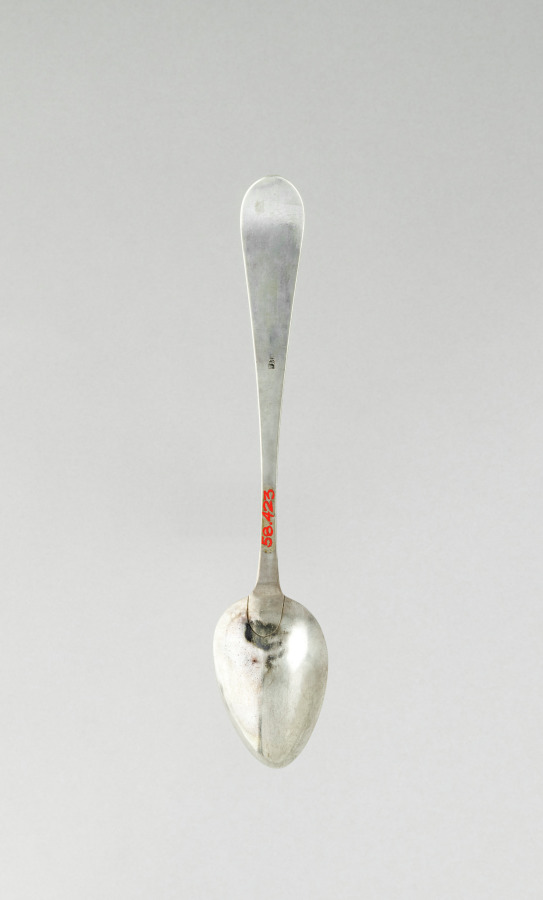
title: Tablespoon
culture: America, Massachusetts, Newburyport, 18th century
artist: Joseph III Moulton (American, 1744–1816)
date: c. 1790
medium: silver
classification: Silver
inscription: engraved "EDM" in bright-cut script within a reserve on top of handle end.